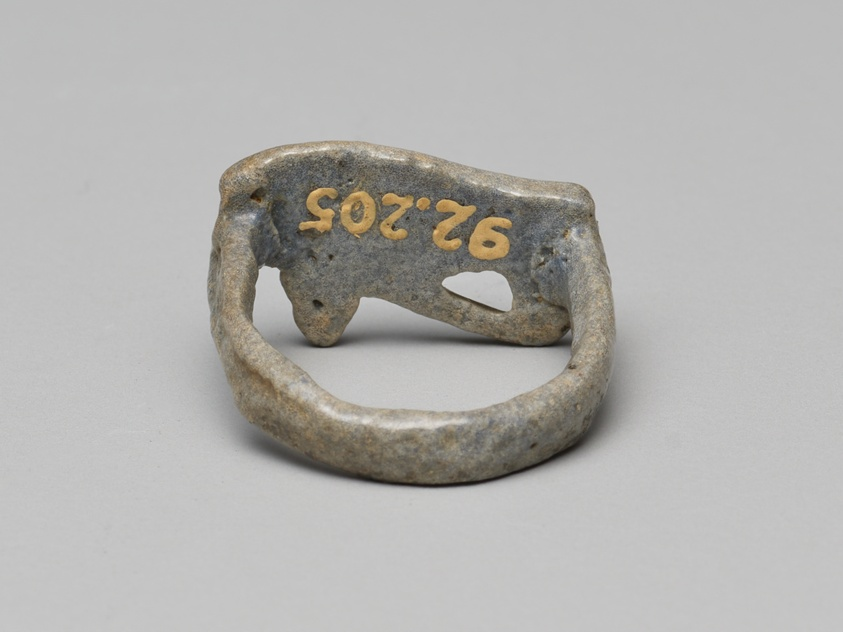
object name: Costume and Accessories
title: Eye of Horus (Wedjat) Finger Ring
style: new kingdom, egyptian, ancient, eighteenth dynasty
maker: Egyptian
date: late Dynasty 18, about 1390–1295 BCE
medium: Faience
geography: Egypt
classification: ring (jewelry); ceramics; jewelry; ancient art; costume; faïence (composite material)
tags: eye of Horus, eyes, Hieroglyphs